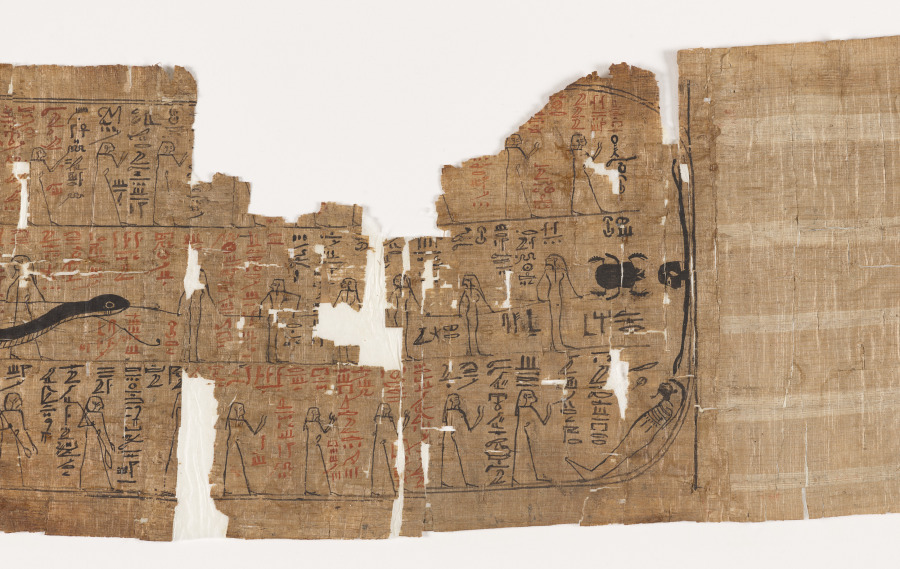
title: Book of Amduat, Perhaps of Bakenmut, with Elements of the Tenth through Twelfth Hours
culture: Egypt, Third Intermediate (1069–715 BCE), Dynasties 21–22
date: 1000–900 BCE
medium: papyrus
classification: Funerary Equipment